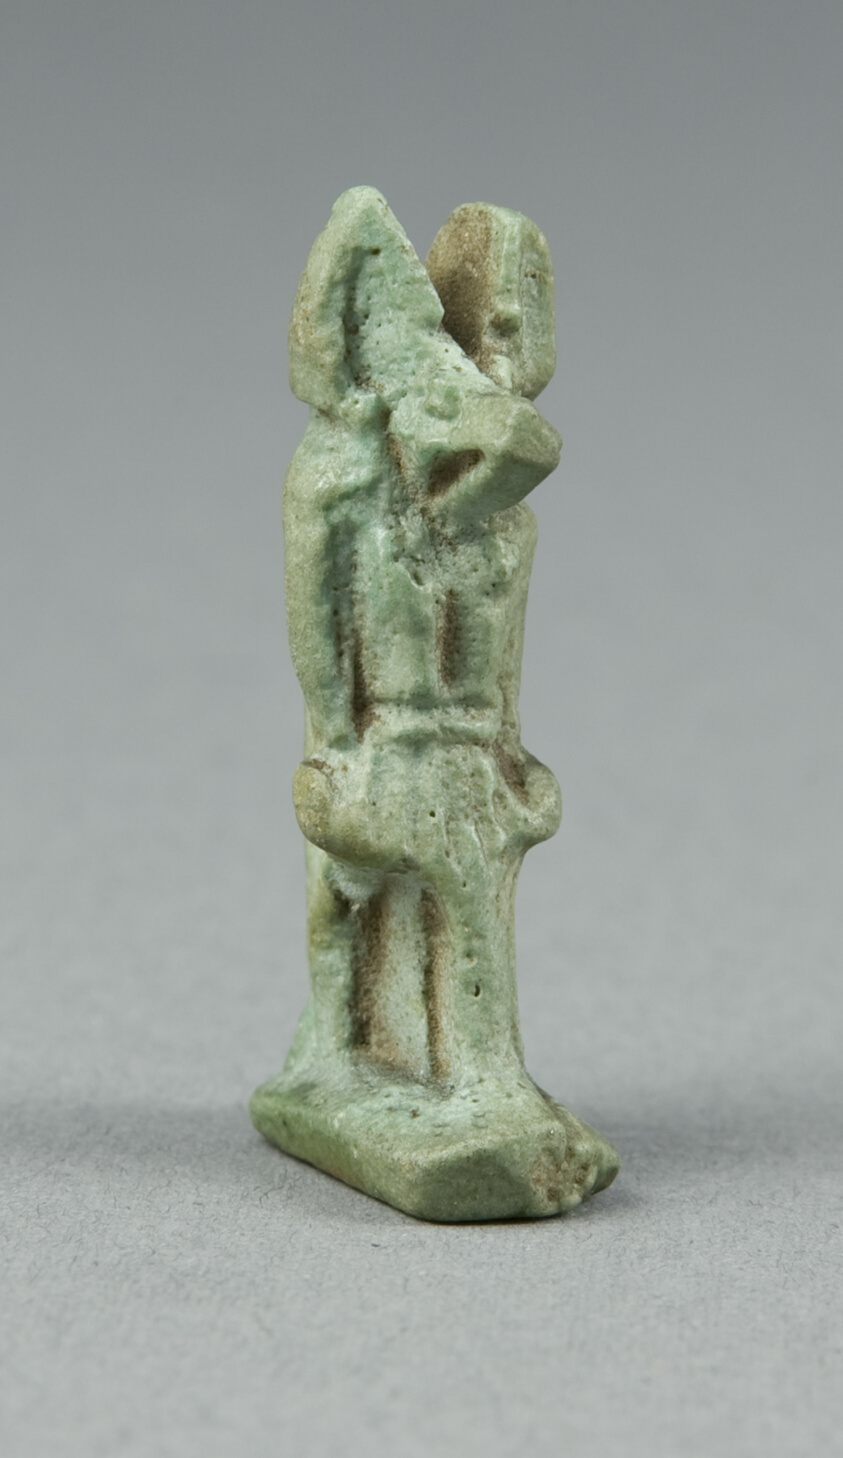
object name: Costume and Accessories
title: Amulet of the God Anubis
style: egyptian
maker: Egyptian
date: Late Period, Dynasties 26–31 (664–332 BCE)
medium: Faience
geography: Egypt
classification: amulet; jewelry; ceramics; ancient art; costume; faïence (composite material)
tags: gods (deities)